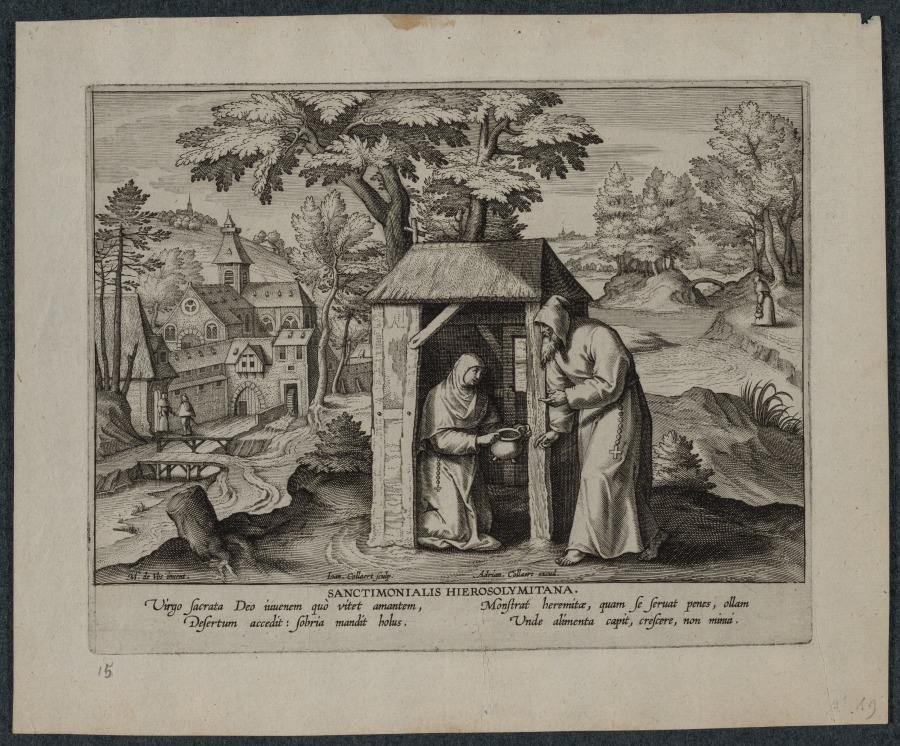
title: Saint Jerome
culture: Flanders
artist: Hans Collaert (Flemish, 1566–1628)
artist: after Maarten de Vos (Flemish, 1532–1603)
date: 1580–1600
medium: engraving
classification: Print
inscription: lower margin, in graphite: 15